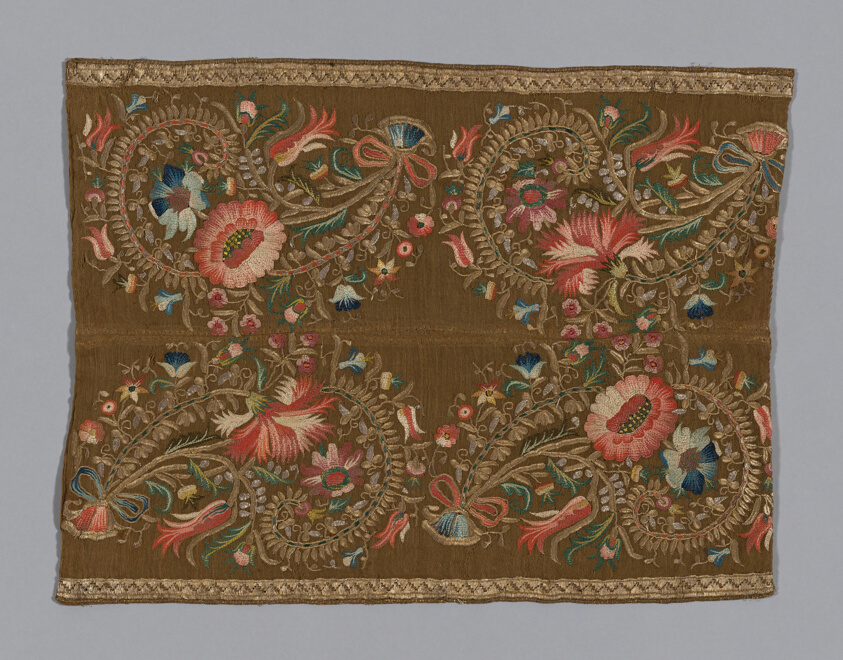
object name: Textile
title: Fragment (Towel End)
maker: Turkey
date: 19th century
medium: Embroidered in design of floral sprays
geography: Turkey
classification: textile; weaving; needlework (visual works)